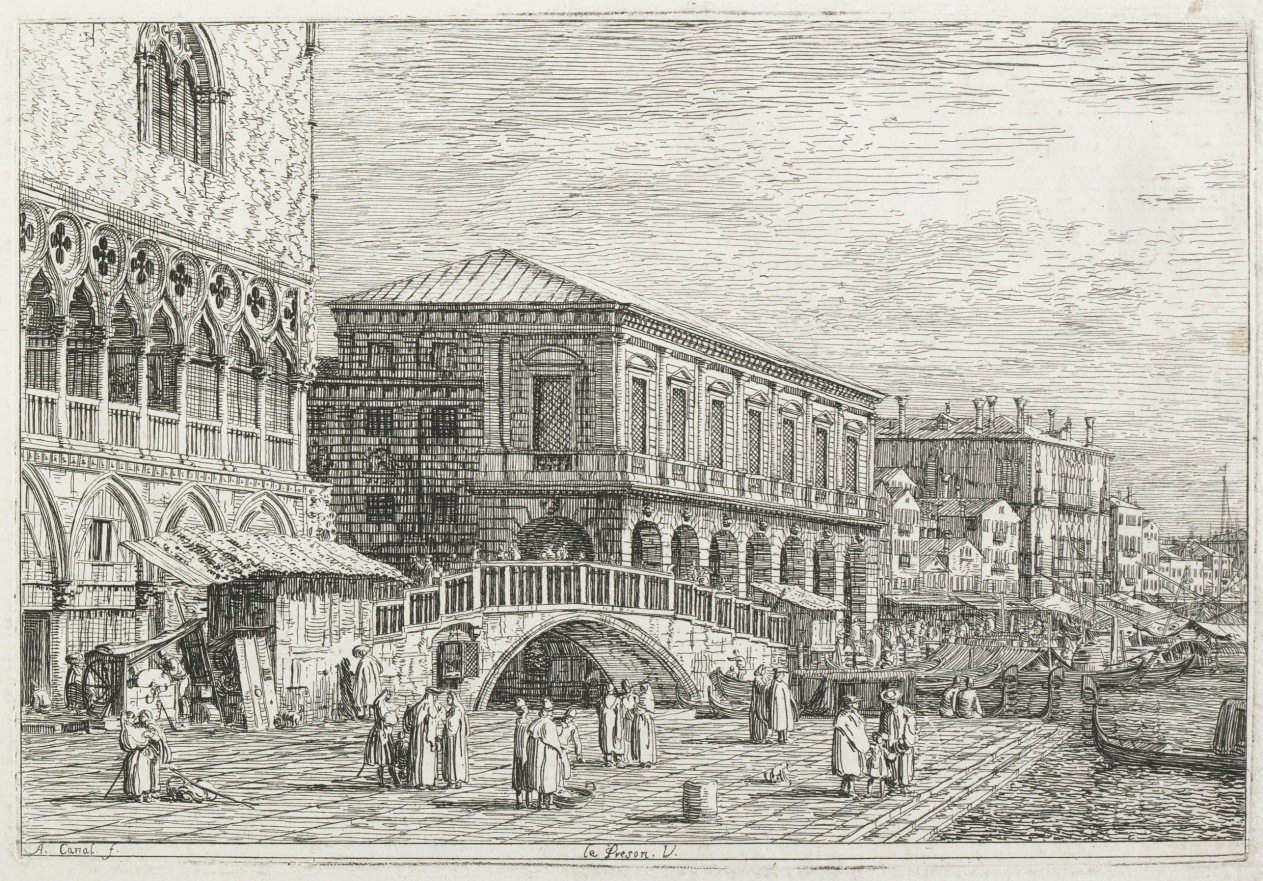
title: Views: The Prison, Venice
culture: Italy, Venice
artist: Antonio Canaletto (Italian, 1697–1768)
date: 1735–1746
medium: etching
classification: Print